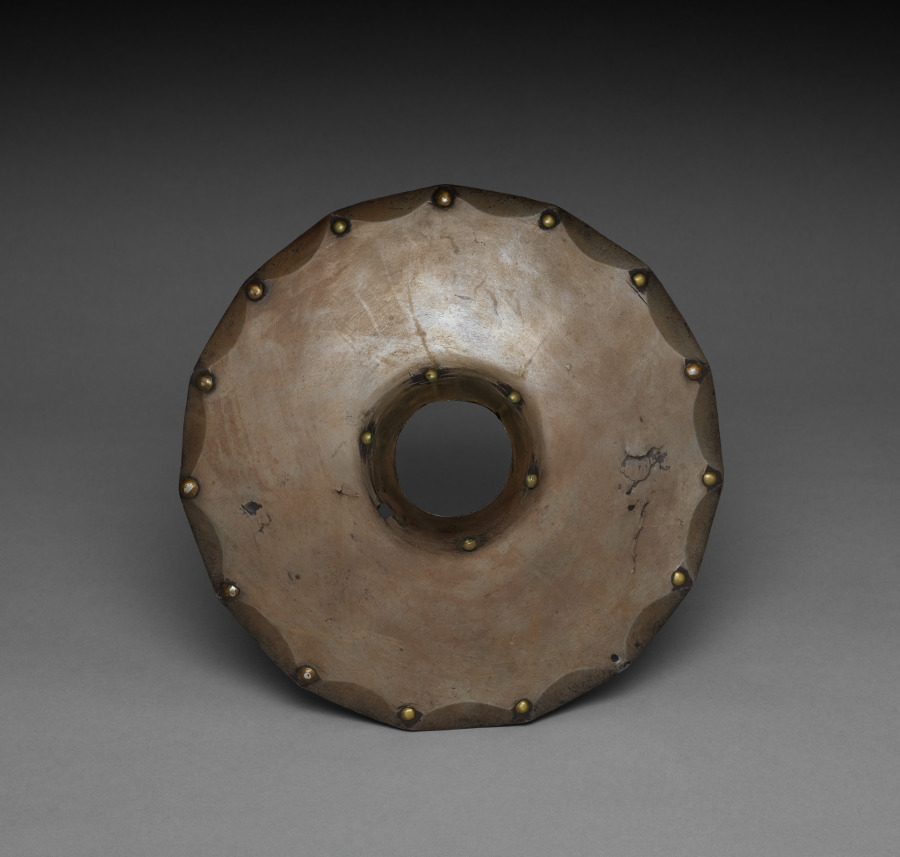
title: Vamplate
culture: Germany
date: 1500s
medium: steel with scalloped edge; brass rivets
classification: Arms and Armor